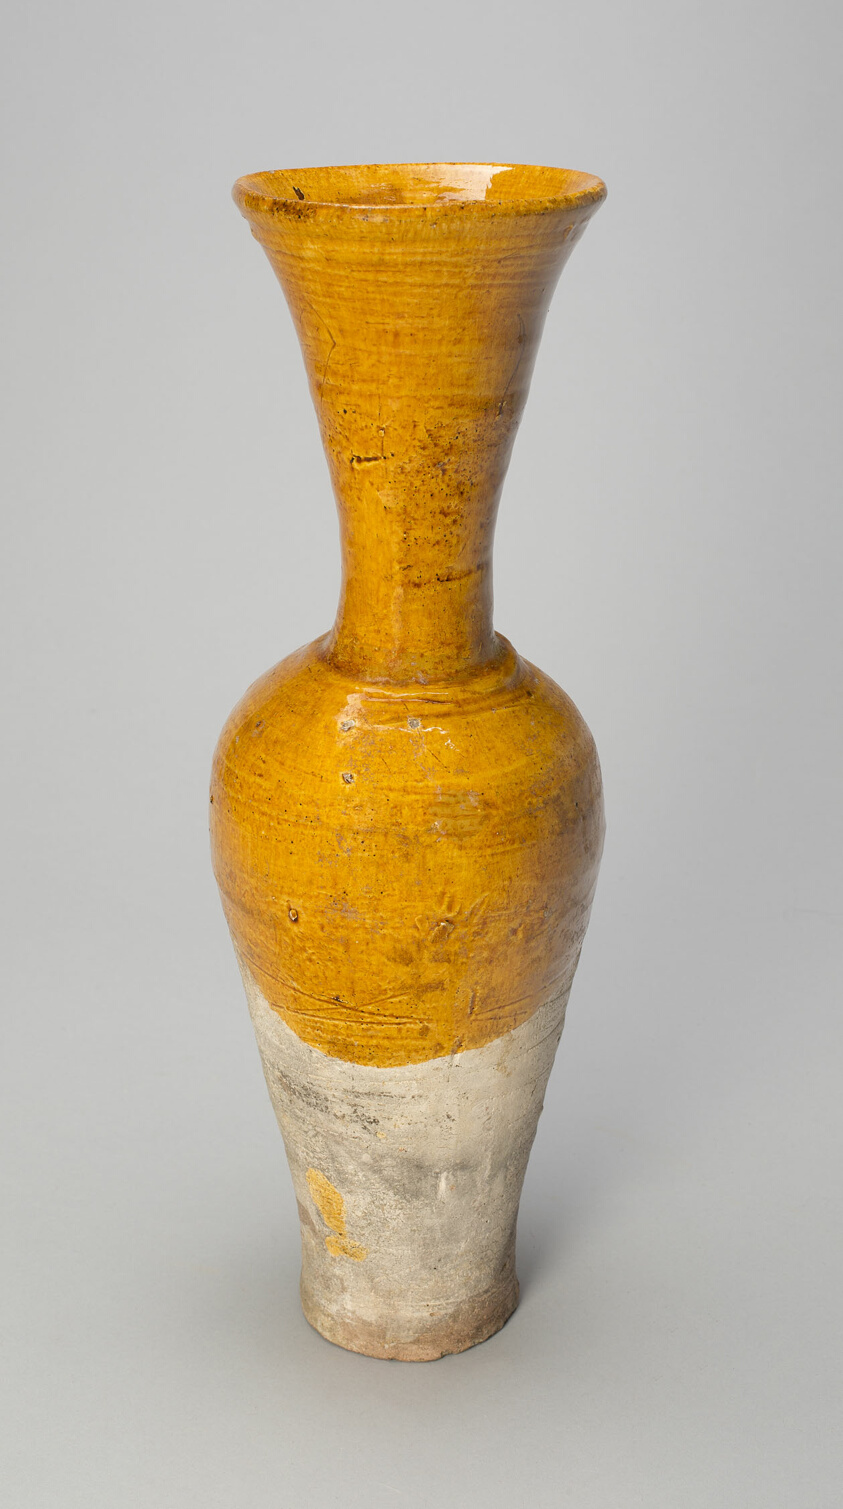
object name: Vessel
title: Vase with Trumpet-Shaped Mouth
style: Chinese (culture or style)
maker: China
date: Liao dynasty (907–1124), 11th century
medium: Stoneware with amber lead glaze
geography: China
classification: vase; vessel; stoneware; ceramics; asian art